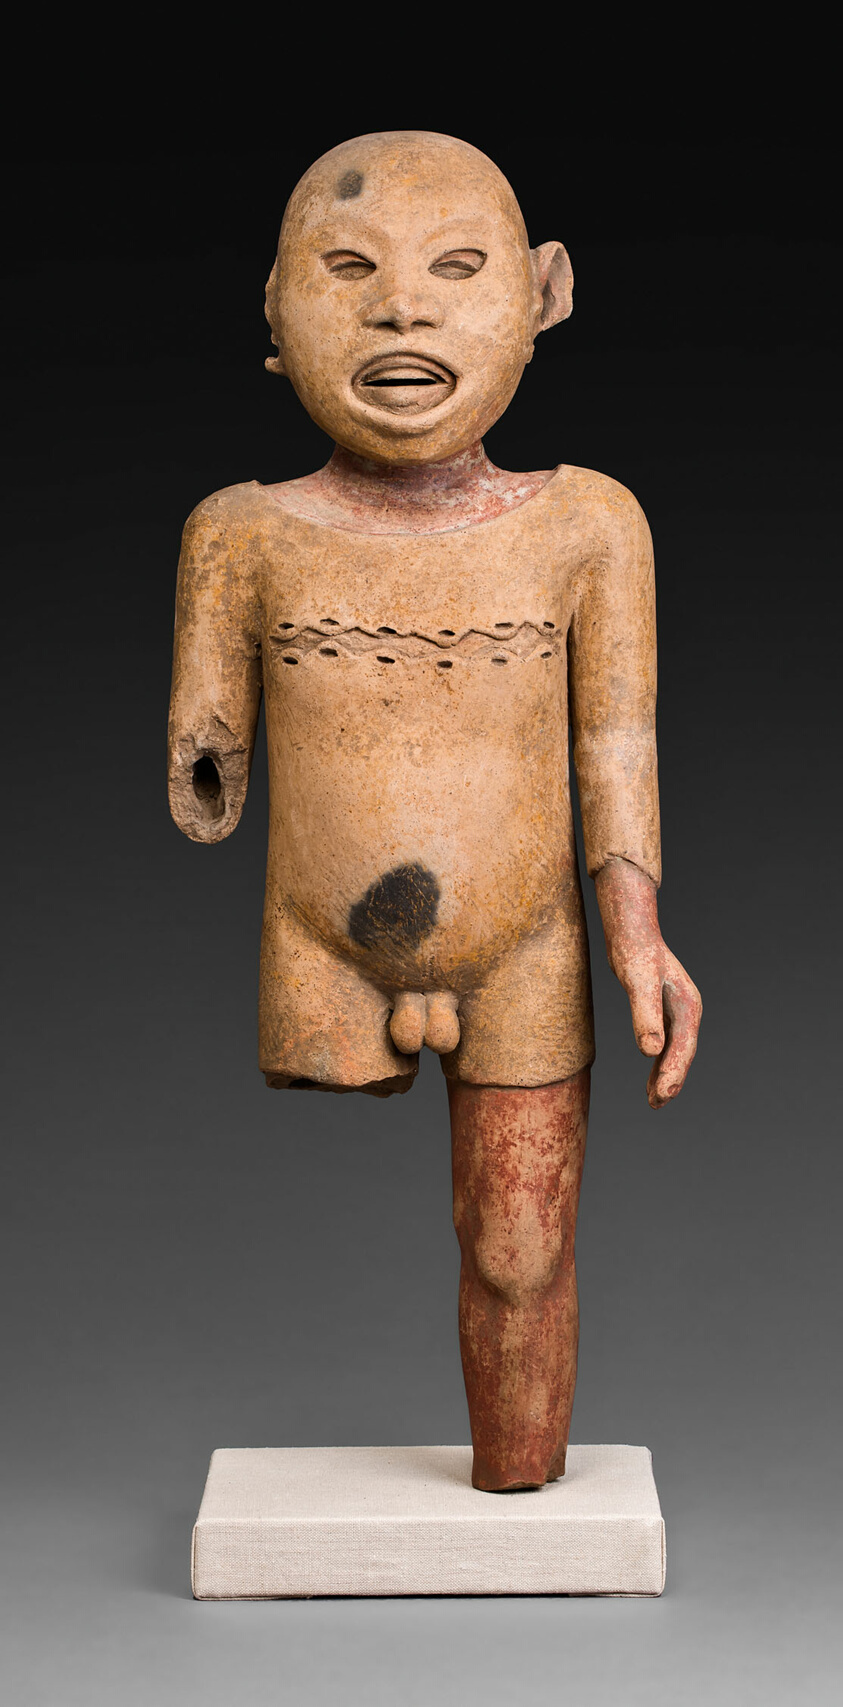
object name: Sculpture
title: Ritual Impersonator of the Deity Xipe Totec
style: aztec, mesoamerican, Pre-Columbian, americas, Arts of the Americas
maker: Aztec (Mexica) (Possibly central Veracruz, Mexico)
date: 1450–1500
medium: Ceramic and pigment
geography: Veracruz state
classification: sculpture; art of the americas; ceramics; statue; ritual objects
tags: sacrifice, ritual sacrifices, agriculture, rituals, mythology, masks